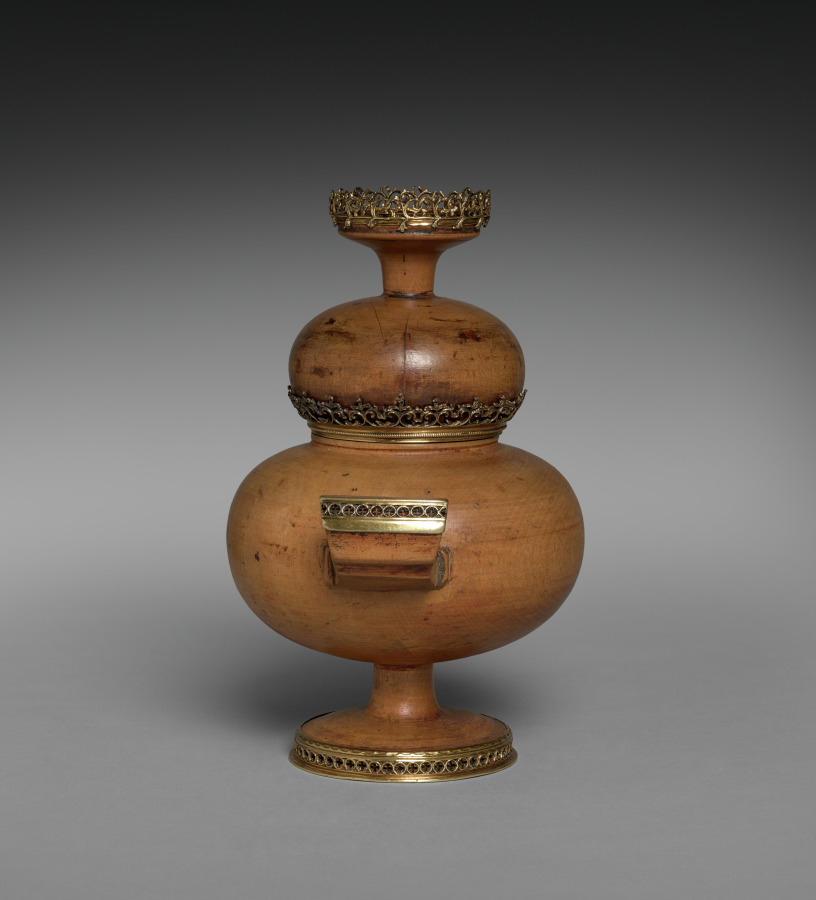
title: Double Cup (Mazer)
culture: Germany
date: c. 1530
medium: maple wood with gilt-silver mounts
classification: Wood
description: A characteristic form of drinking vessel made of close-grained wood, especially maple, was developed in Germany as early as the thirteenth century. It consisted of a larger cup with a foot and a handle and a smaller cup on top. The upper one served as a lid but could also be removed and used as a separate drinking vessel. In this example the smaller upper cup is inset with a memorial portrait medallion of Albrecht Dürer made in the year of his death, 1528. The medal is the work of Matthes Gebel who was active in Nuremberg and Augsburg as a medallist from 1523 to his death in 1574. The reverse of the medal is set into the base of the larger lower cup.